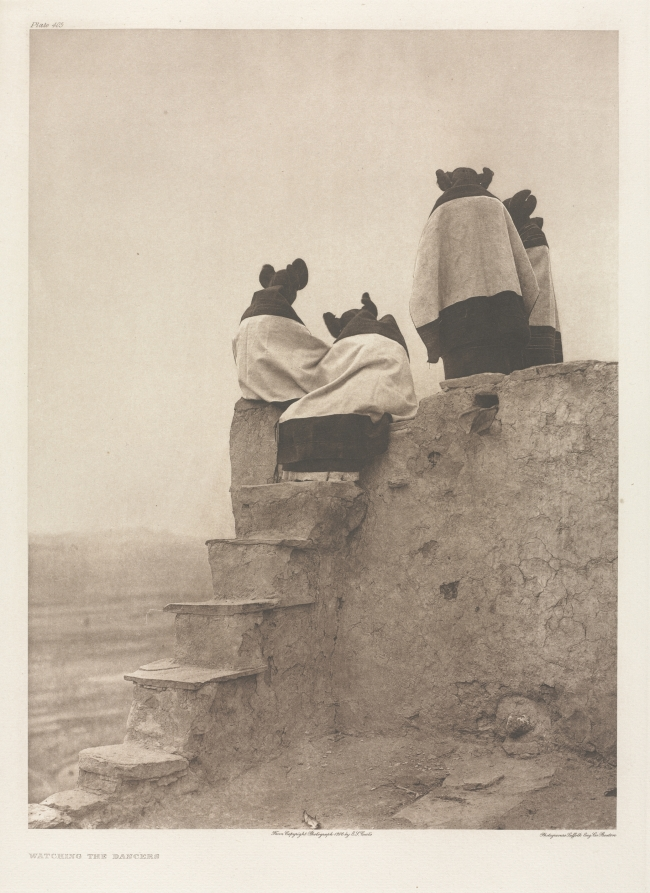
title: Portfolio XII, Plate 405: Watching the Dancers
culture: America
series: The North American Indian: being a series of Portfolios picturing and describing the Indians of the United States, the Dominion of Canada, and Alaska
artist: Edward S. Curtis (American, 1868–1952)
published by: The University Press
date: 1905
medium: photogravure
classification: Portfolio